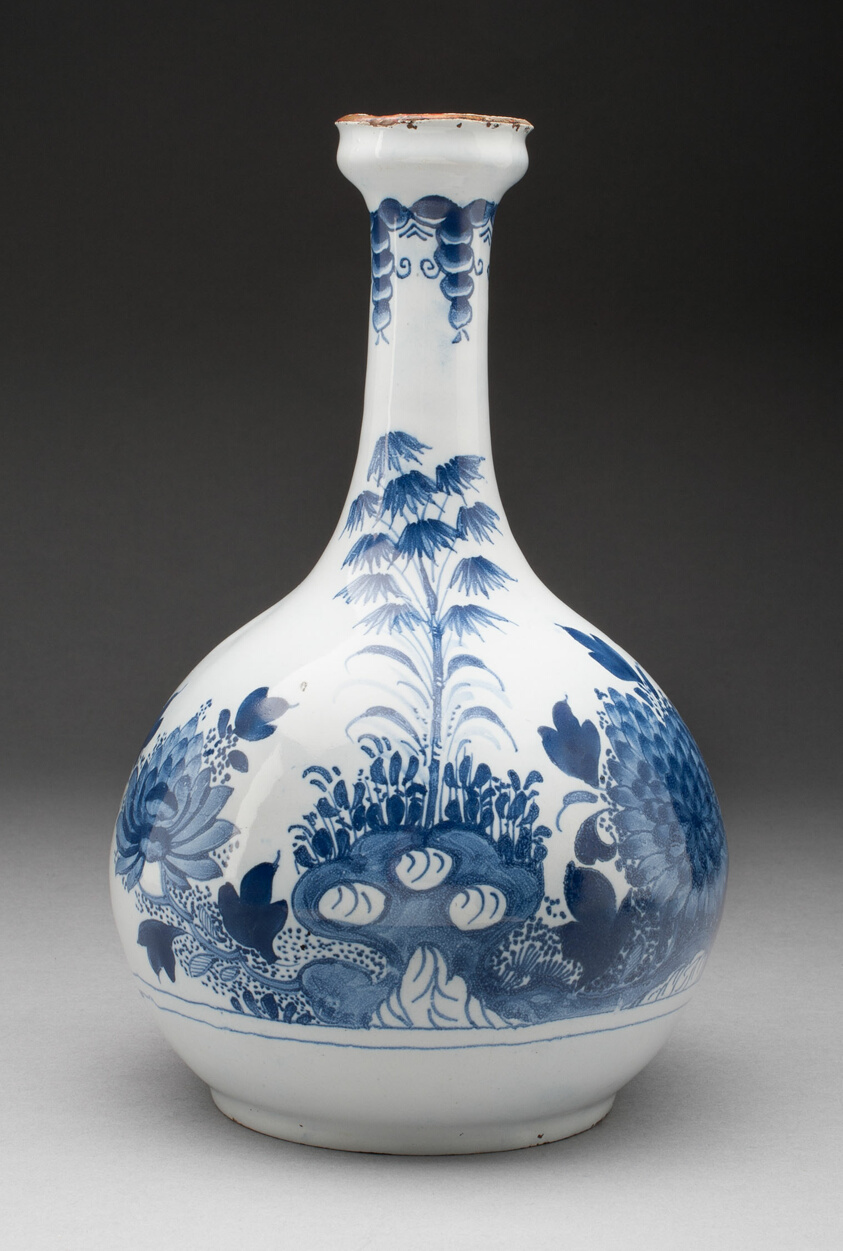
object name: Ceramics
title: Bottle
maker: England, Liverpool or London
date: c. 1750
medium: Tin-glazed earthenware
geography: Liverpool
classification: earthenware; tin-glazed ware; european decorative arts; ceramics